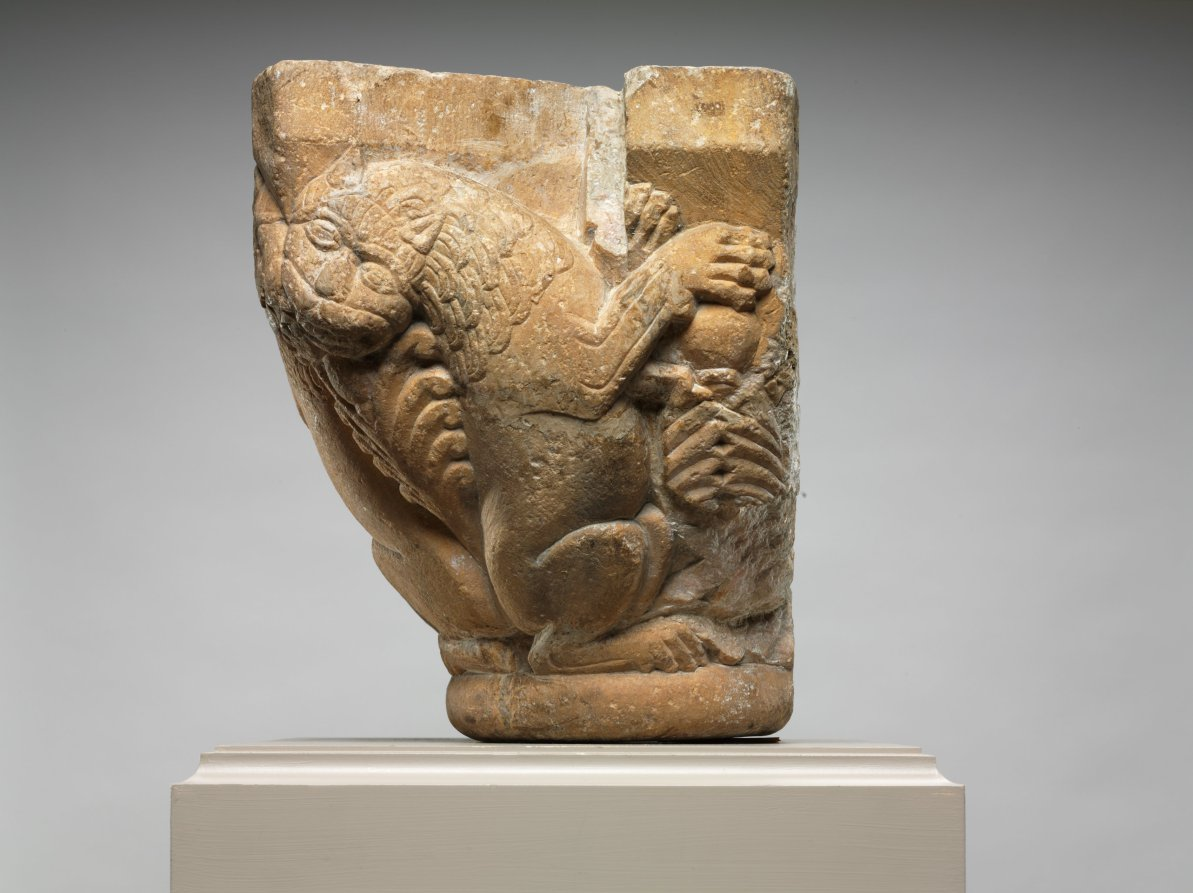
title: Engaged Capital with Lions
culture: Northern Spain (Navarre ?) or Southwest France (Pyrénées or Roussillon ?), mid-12th century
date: 1145–64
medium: marble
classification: Sculpture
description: The compositional motif of confronted and addorsed beasts illustrated on this capital was especially popular in churches along the pilgrimage roads.